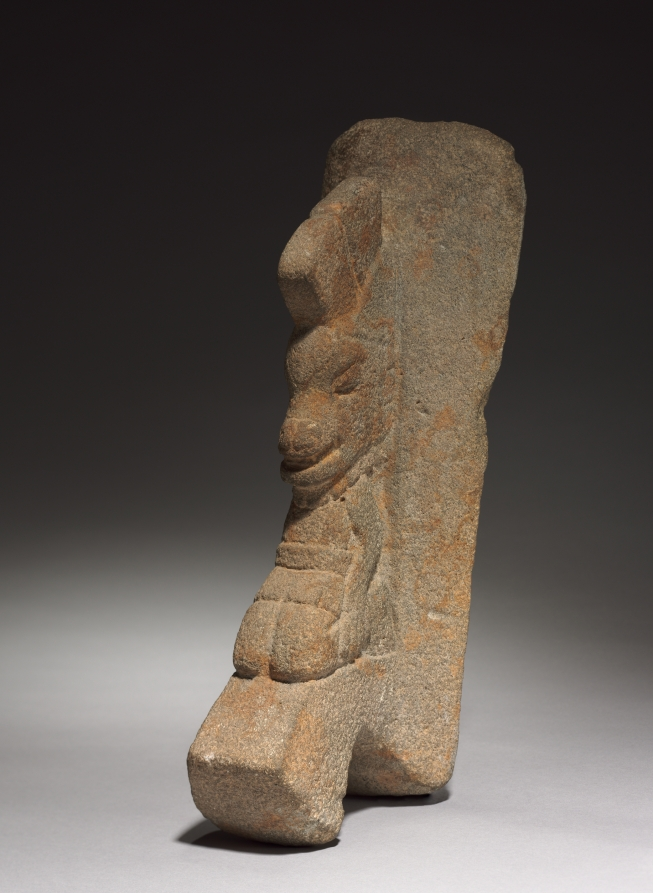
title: Animal Palma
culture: Mexico, Veracruz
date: 600–1000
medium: gray volcanic stone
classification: Sculpture